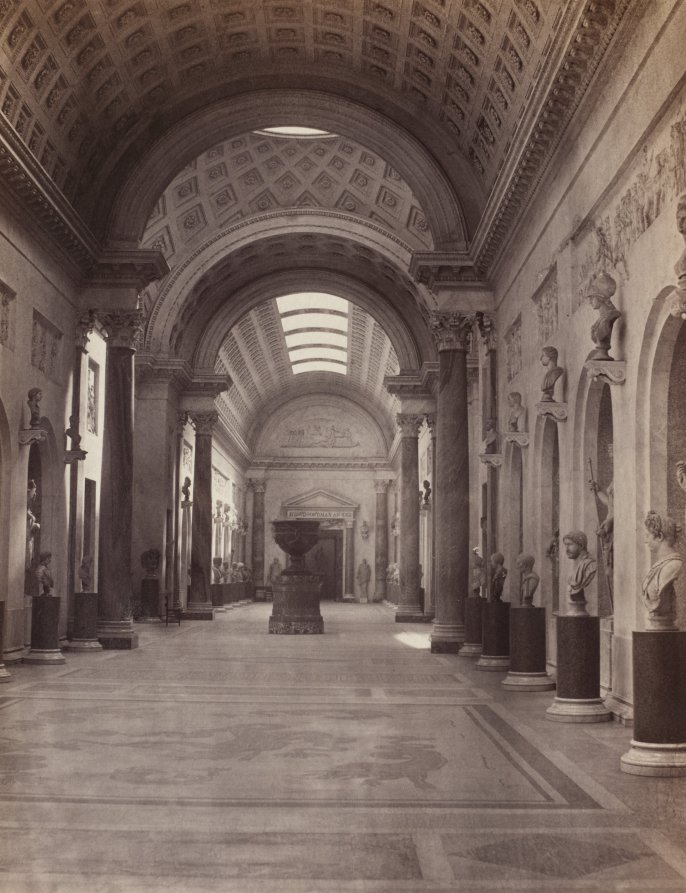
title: Vatican: Galerie Nuovo Braccio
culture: France, 19th century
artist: Charles Soulier (French, 1840–1875)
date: c. 1860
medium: albumen print from a collodion negative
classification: Photograph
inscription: Imprinted on primary mount: "Photographié après nature par CH. SOULIER/PHOTOGRAPHE de L'EMPEREUR./ROME/VATICAN.GALERIE NUOVO. BRACCIO./442" Written in pencil on verso of mount: "67" "IT-21" Partially erased pencil on recto of mount: "(760) c"